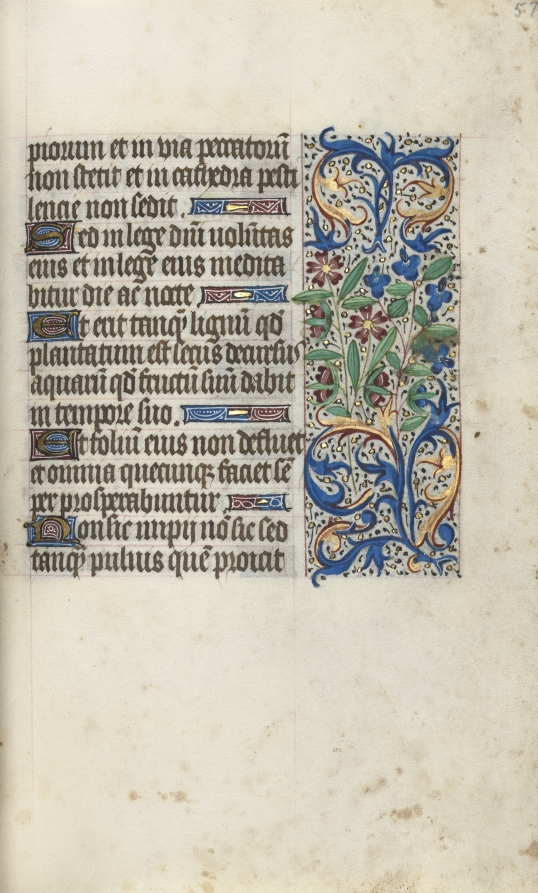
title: Book of Hours (Use of Rouen): fol. 57r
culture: France, Rouen, 15th century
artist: Master of the Geneva Latini (French, active Rouen, 1460–80)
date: c. 1470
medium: ink, tempera, and gold on vellum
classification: Bound Volume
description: In the late 1400s and early 1500s Rouen was an established and important center of book production. The city’s cathedral had a wealthy chapter that spent large sums of money to commission books and to maintain its extensive library. The stationers and booksellers would have likely been concentrated in or near the cathedral precinct. This artist, named after a manuscript now in Geneva, was Rouen’s principal illuminator during the second half of the 1400s.